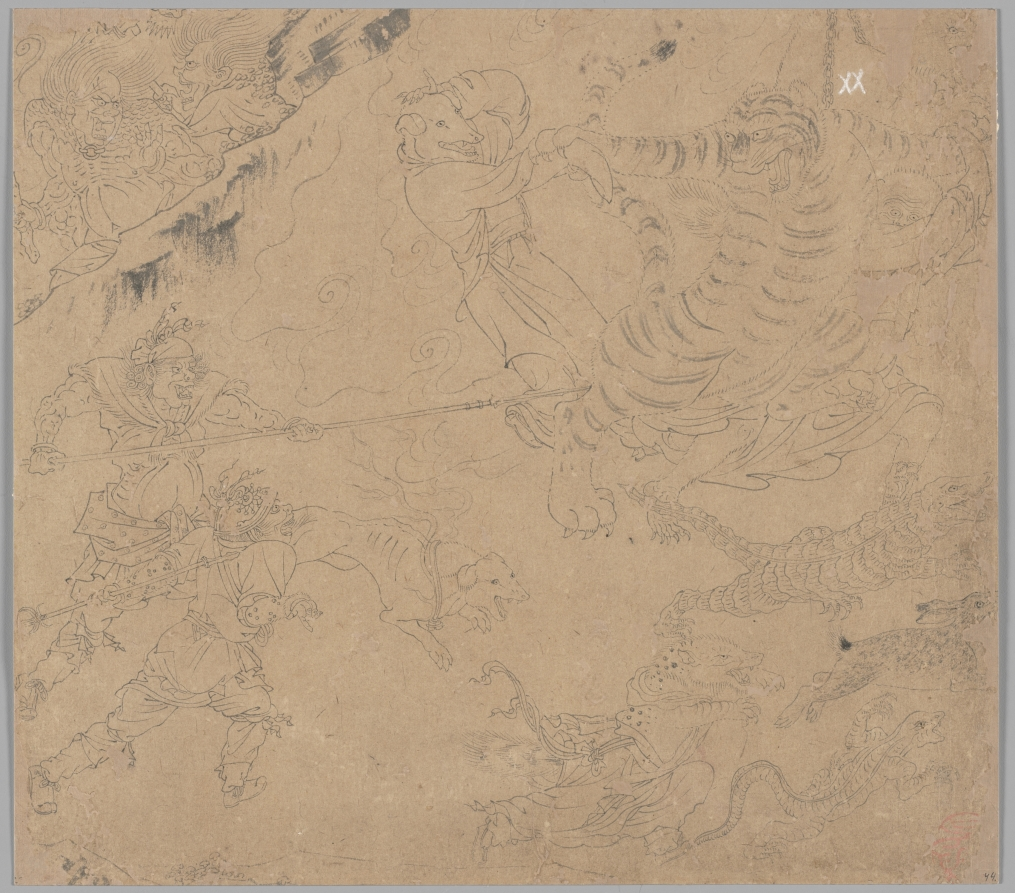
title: Album of Daoist and Buddhist Themes: Search the Mountain: Leaf 44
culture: China, Southern Song dynasty (1127-1279)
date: 1200s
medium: Album, ink on paper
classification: Painting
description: This extraordinary album has 50 paintings on a variety of religious subjects. They were likely created by several master craftsmen to share with studio apprentices as models for fulfilling commissions. The Jade Emperor and the Daoist pantheon make up the first 26 leaves. The next 14 leaves portray the Buddhist Ten Kings of Hell administering punishments to the dead. The third section, called “Clearing the Mountains,” features divine soldiers, led presumably by the deity Erlang Shen 二郎神, fighting undesirable creatures.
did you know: A tiger, confronted by two demon-soldiers with a spear, seizes the sleeve of a half-human creature. Two other soldiers and a hunting dog chase a part-human creature, an alligator, a hare, and a lizard.